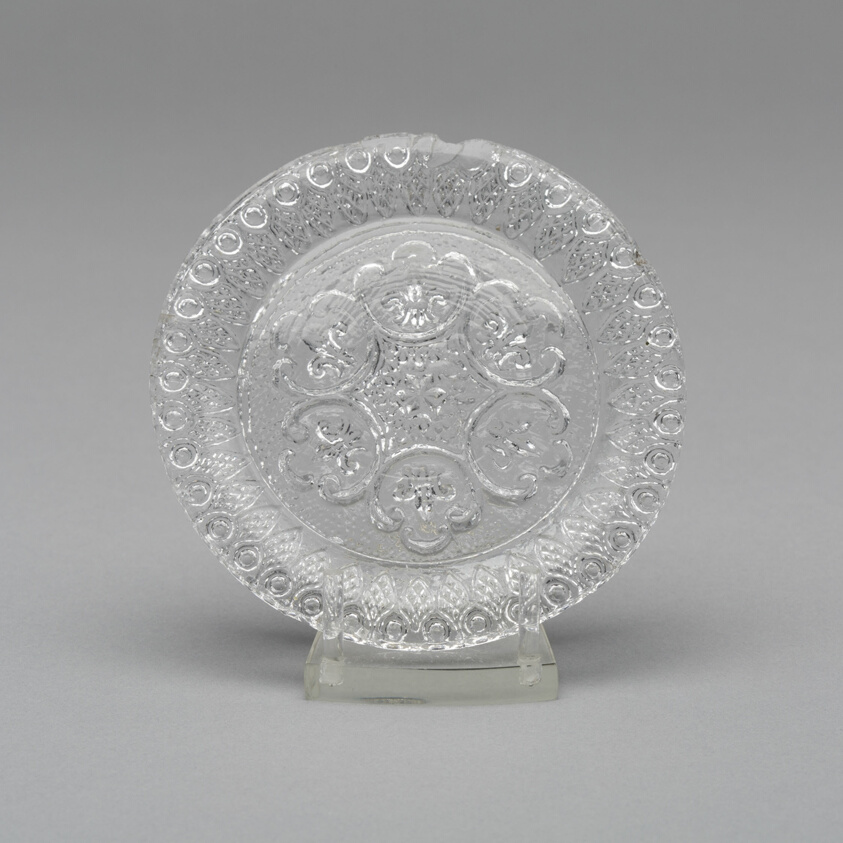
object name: Glass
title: Cup plate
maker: Artist unknown (American, 19th century); Philadelphia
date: 1830–35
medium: Pressed glass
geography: Philadelphia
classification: plate (general, dish); glass; american decorative arts; american arts; decorative arts